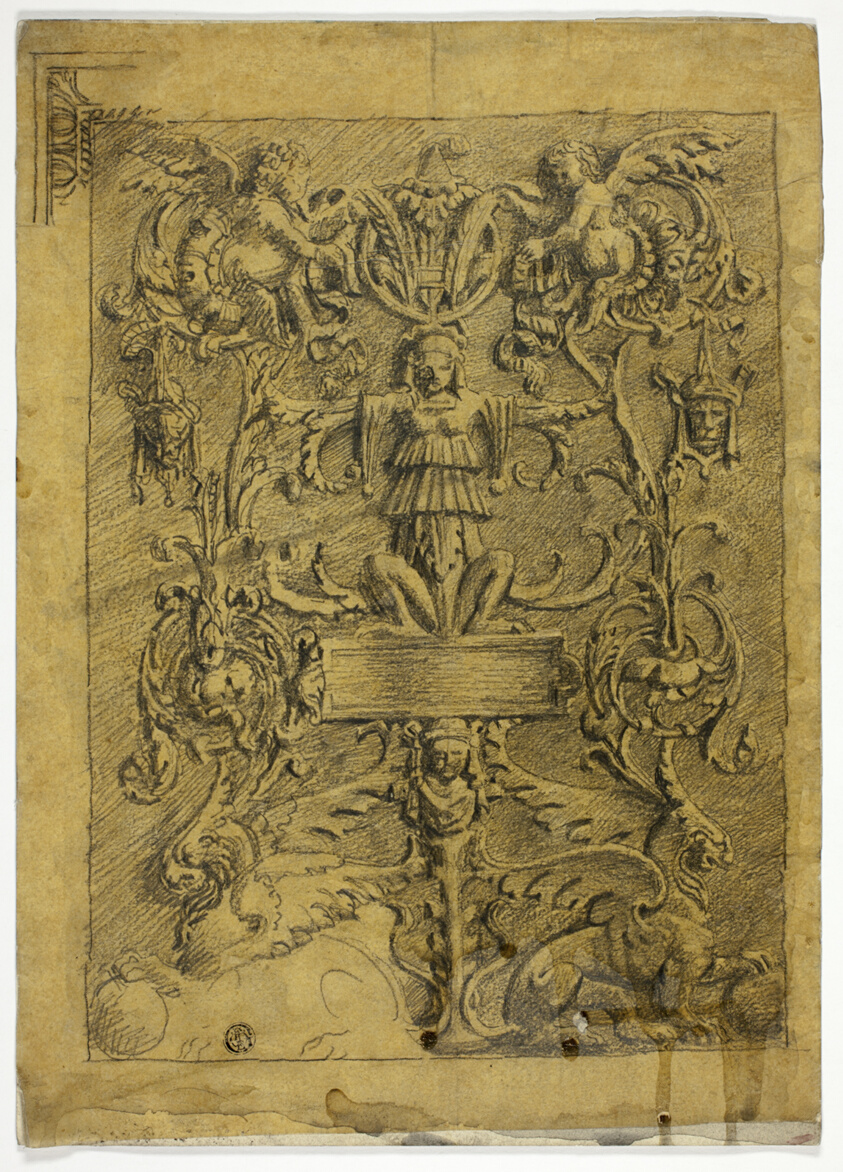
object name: Drawing and Watercolor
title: Decorative Design with Putti and Griffins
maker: Attributed to Alfred George Stevens; English, c. 1817-1875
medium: Graphite, on tan wove tracing paper, laid down on ivory wove paper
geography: England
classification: graphite; drawings (visual works); prints and drawing